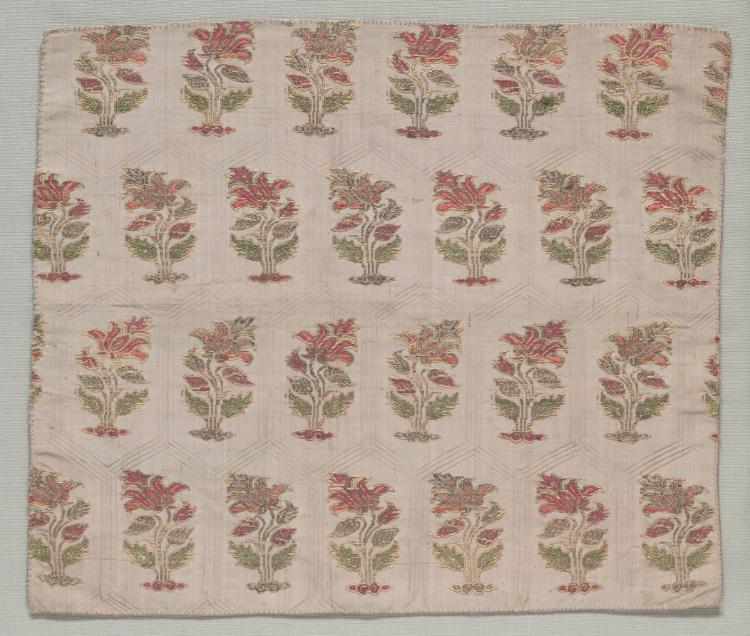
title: Fragment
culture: Iran, 18th century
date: 1700s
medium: brocade; silk and metal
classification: Textile